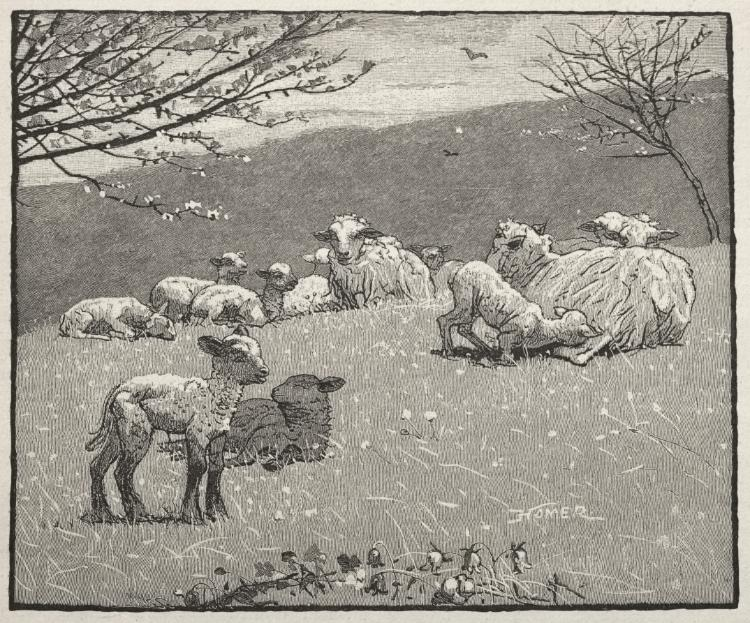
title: Spring Lamb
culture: America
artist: Winslow Homer (American, 1836–1910)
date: 1880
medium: wood engraving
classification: Print